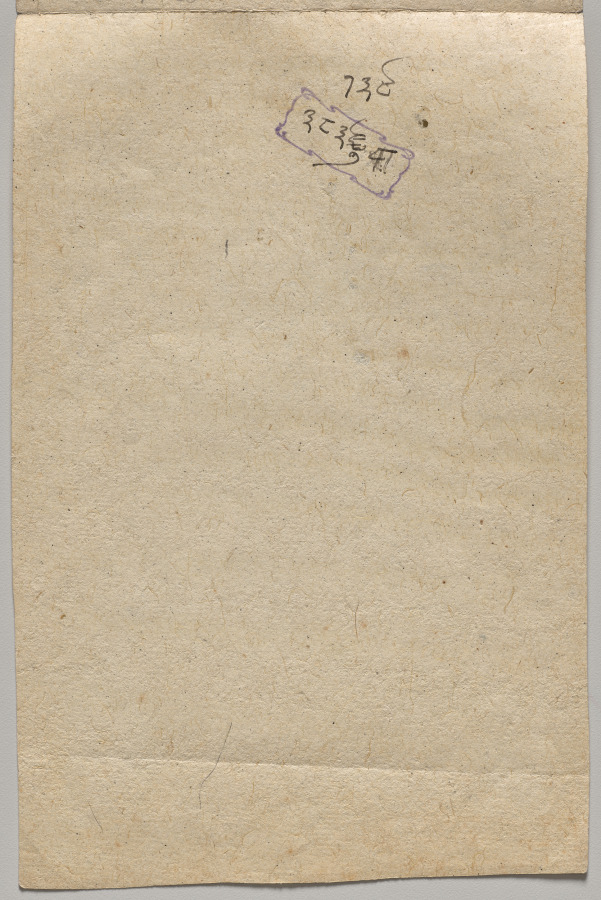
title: Goddess standing on a mountaintop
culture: Northern India, Pahari kingdoms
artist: attributed to Master of the court of Mandi (Indian)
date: c. 1720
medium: Gum tempera and gold on paper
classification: Painting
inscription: 67. 30. 83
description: The four-armed goddess, whose name remains unknown, presides over a scene of carnage. Two dark-skinned women offer halved heads full of blood. A buffalo that stands for her devotees’ enemies has been sacrificed. Jackals and birds of prey cheerfully take away shares of flesh. An important aspect of religious practice in the northwest Himalayas, the worship of fierce goddesses was thought to aid their devotees in conquering enemies, psychological and otherwise. She wears the enemies as corpses in her ears and as a garland around her neck.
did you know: The Goddess is wearing a garland of corpses.